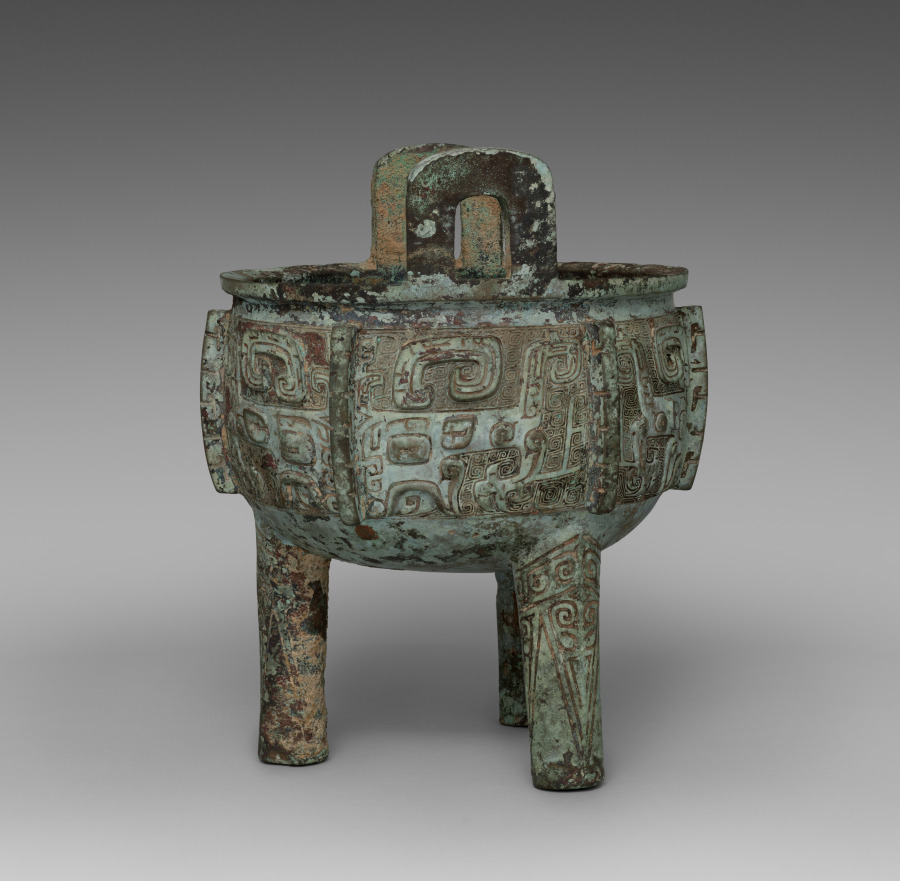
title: Tripod (Ding)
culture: China, Shang dynasty (c. 1600–c. 1046 BCE), Anyang phase (c. 1250–1046 BCE)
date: c. 1250–1046 BCE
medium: bronze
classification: Metalwork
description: Animal images in ritual bronzes served as symbolic messengers of the supernatural realms. Among others, the animal mask called taotie emerged as the most potent symbolic form. The formidable mask emanates a powerful presence with an unforgettable stare. It expresses an overwhelming feeling of mystery, representing a transcendent, supernatural concept in ancient ritual art.